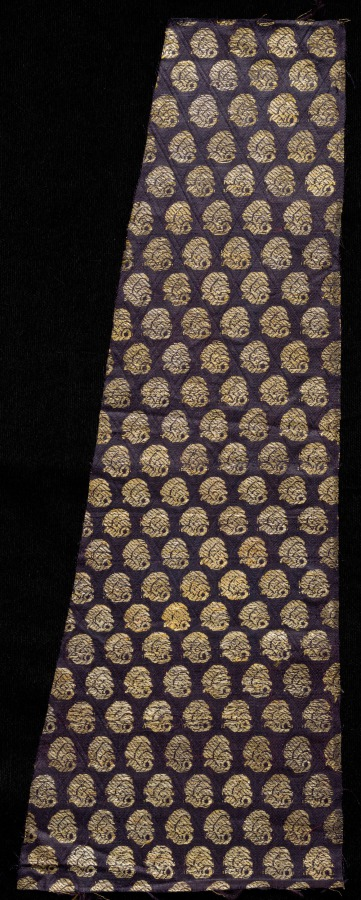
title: Fragment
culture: India, 19th century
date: 1800s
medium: brocade; satin ground with silver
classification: Textile